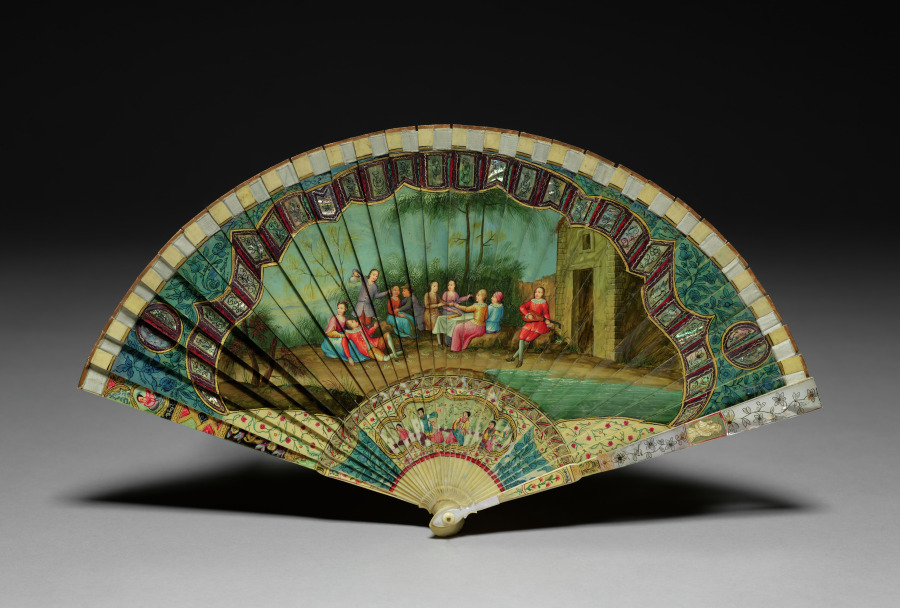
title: Fan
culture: France(?)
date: 1800s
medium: bone, mother-of-pearl, ivory washer, silk ribbon, oil paint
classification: Miscellaneous